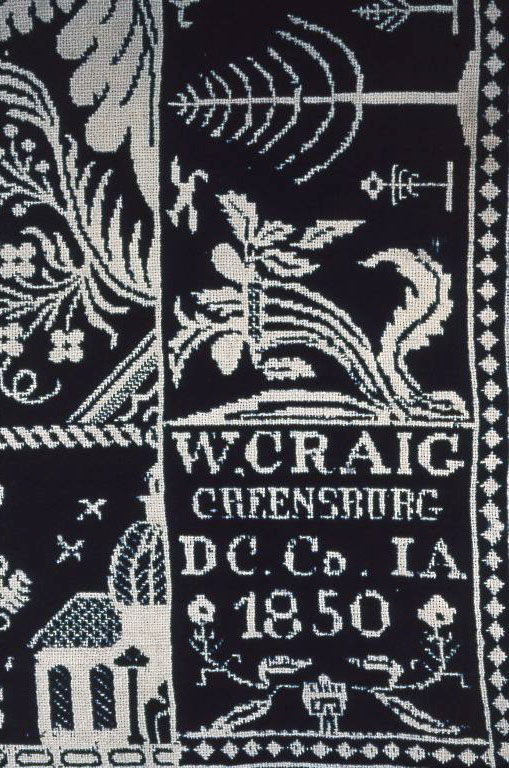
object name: Textile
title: Coverlet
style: 19th century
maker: William Craig, Jr. (American, c. 1824-1880); United States, Indiana, Decatur County, Greensburg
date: 1850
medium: Cotton and wool, plain weave double cloth; woven on loom with Jacquard attachment; two loom widths joined; fringed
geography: Indiana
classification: weaving - coverlet; coverlet; weaving; textile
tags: floral motifs, trees, circles, squares, flowers, diamond shapes, scrolls (motifs), medallions, foliage, candles, urns, buildings, birds, coverlet